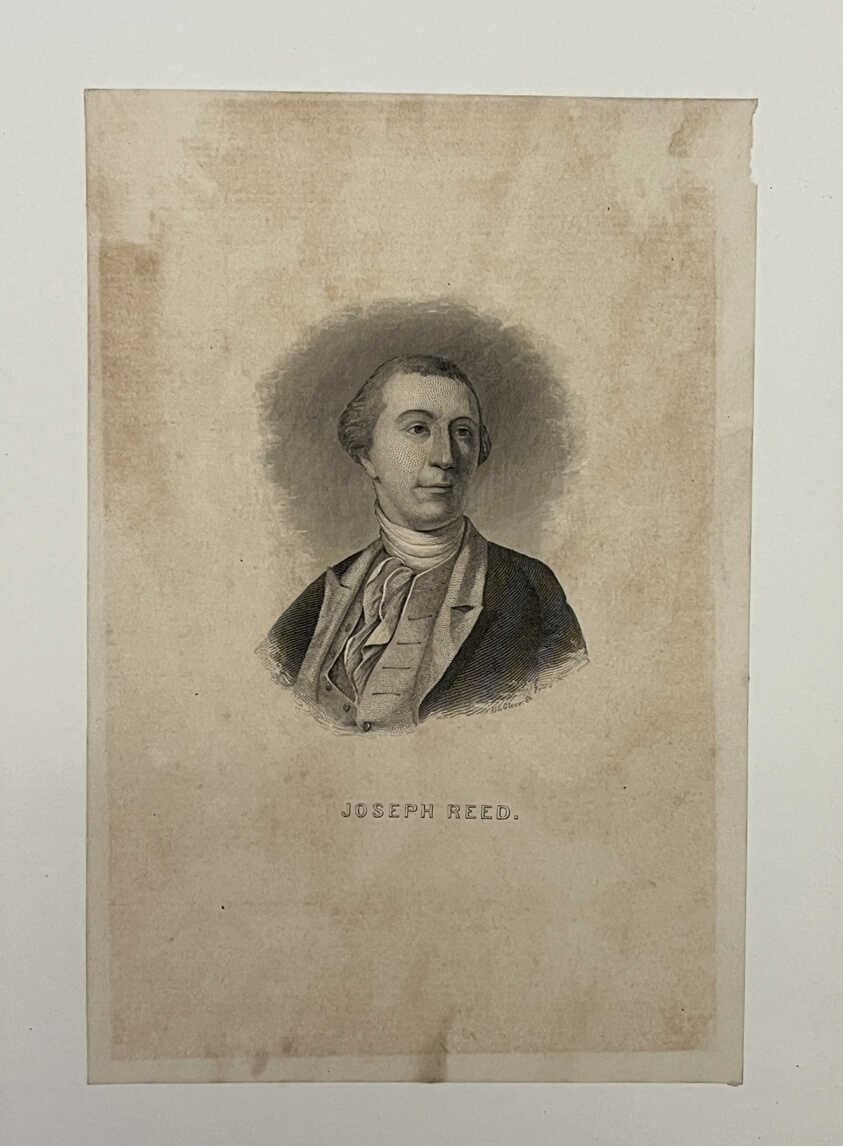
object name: Print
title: Joseph Reed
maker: De Lay Glover (American, 1832-1863)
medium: Etching on paper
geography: United States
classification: reproduction; print; prints and drawing